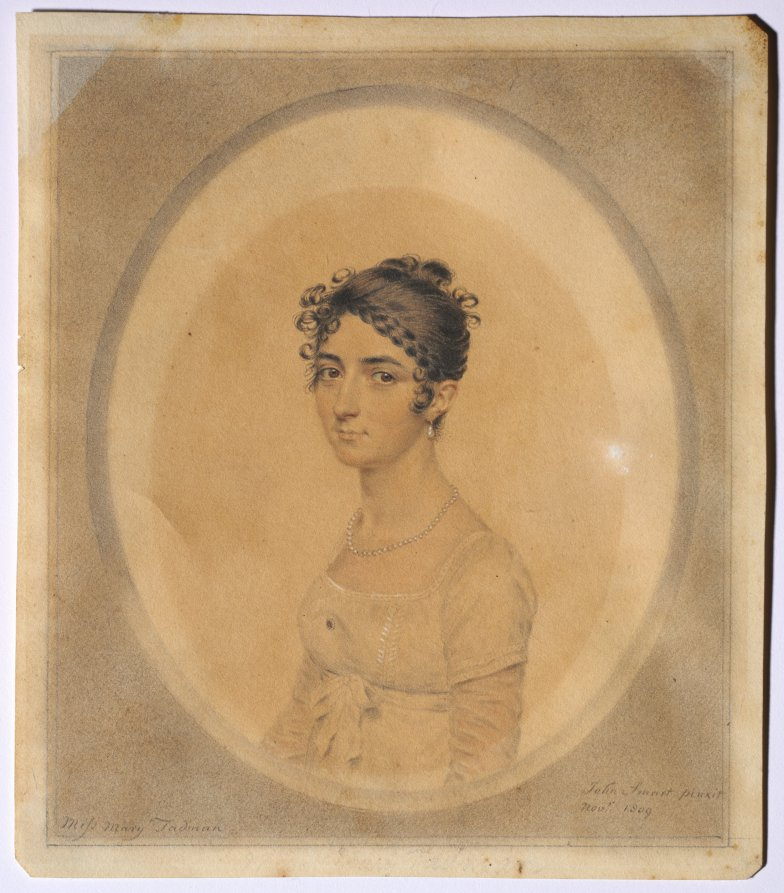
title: Portrait of Miss Mary Tadman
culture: England, 18th century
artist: John I Smart (British, 1741–1811)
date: 1809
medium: watercolor and graphite, heightened with traces of white gouache on paper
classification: Portrait Miniature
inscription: signed, lower right, in gray watercolor: John Smart pinxit / Novr. 1809 ; by artist, lower left, in gray watercolor: Miss Mary Tadman ; VERSO, upper left, in graphite: B/8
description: Mary Tadman’s head and shoulders face right. Her eyes are brown, and she wears a necklace of small pearls and a drop pearl earring. She wears her dark brown hair high in a classically inspired bun, with a braid across the hairline and many curls falling over her forehead and in front of her ears. Her white dress is delicately embroidered at the edges along the bust and is tied at the empire style waist, with a small pin fastened to the front. The translucent white sleeves worn beneath the dress are probably made of muslin and detachable, since they do not appear in the ivory version of the portrait. Detachable sleeves were popular during the late eighteenth and early nineteenth centuries and enabled a dress to function as day- and eveningwear. The nature of this work as a finished drawing rather than exclusively a preparatory sketch for a miniature on ivory is evident in the degree of finish of the sitter’s clothing, heightened with white gouache and painted to the elaborated penciled oval border. In December 1809, the year this drawing was executed, Mary Tadman (1786–1862) married Major William Jolliffe Eldridge. He died in 1818 in Poona, India, and three years later, his widow married Colonel Daniel Hutchins Bellasis (1785–1836), with whom she had two children: Flora and Augustus Fortunatus. Mary lived for nearly two decades in India, where she was a celebrated beauty, and where her second marriage into the militarily distinguished Bellasis family seems to have secured her presence in high society. On the occasion of her marriage in 1821, she wrote her spinster sister, “I forgot I have not told you a word of my marriage, which by the by was the grandest affair known in Bombay, I am almost tired of the subject—visits and congratulations, etc. The Governor and Staff went with me to Church . . . and all the people of any consequence in Bombay about 100 came to a Breakfast at Randall Lodge—since which it has been one constant scene of gaiety. Last week, pity me when I tell you, how I was obliged to exert myself—we gave a dinner party to 40 people. The Governor’s family . . . and all the Big Wigs who gave me parties—the same evening 160 came at ten to a dance—afterwards a supper very splendid I assure you.” A related ivory version of this miniature is in the Fitzwilliam Museum, Cambridge, signed and dated at the lower left: “J S / 1809.” While Miss Tadman’s coiffure, countenance, jewelry, and dress are identical to the Cleveland sketch, in this portrait she wears an elaborate black and red, flowered Indian shawl with white border over her white dress, the under-sleeves omitted. Indian shawls, particularly those from Kashmir, were extremely expensive signifiers of social status in India and Europe, and by the end of the eighteenth century, they often formed part of the trousseau of a wealthy French or English bride. The shawls were particularly fashionable worn in contrast with the high-waisted gauzy white dresses of the Empire period. While many portraits and miniatures from the early nineteenth century depict women conspicuously displaying their Indian shawls, Miss Tadman wears hers in a manner not often seen in European portraits: across one shoulder and around the waist, like a sari. Mary and William Eldridge wed in December 1809, one month after Smart signed this sketch. Because Smart depicted Miss Tadman during her engagement, the shawl worn in the finished ivory portrait may have been a gift from her betrothed, who had been stationed in Bombay in 1809. While appropriate for a half-length portrait, the under-sleeves were probably deemed unnecessary for the miniature, which shows little of the arm and instead depicts the sitter more formally, wrapped in her shawl. The existence of a larger, finished drawing as well as a miniature on ivory suggests that the finished drawing may have served a variety of roles, while also implying that another preparatory sketch for both may exist. At nearly twice the size of the ivory, Cleveland’s drawing is not likely to have been the sole preparatory exercise for the finished miniature. There is no question that as a young bride-to-be, Miss Tadman was thinking carefully about how she wished to be represented at a pivotal moment in her life, and that a single portrait was insufficient to accommodate all of the accoutrements that were of significance to her. The neo-Grec coiffure, au courant empire waist dress with detachable sleeves, pearl parure, ornamental pin, and costly shawl communicate clearly the social ambitions to which her biography is also a testament.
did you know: This drawing was passed on through the generations of the artist John Smart's family until 1937 when his great-granddaughter sold it.